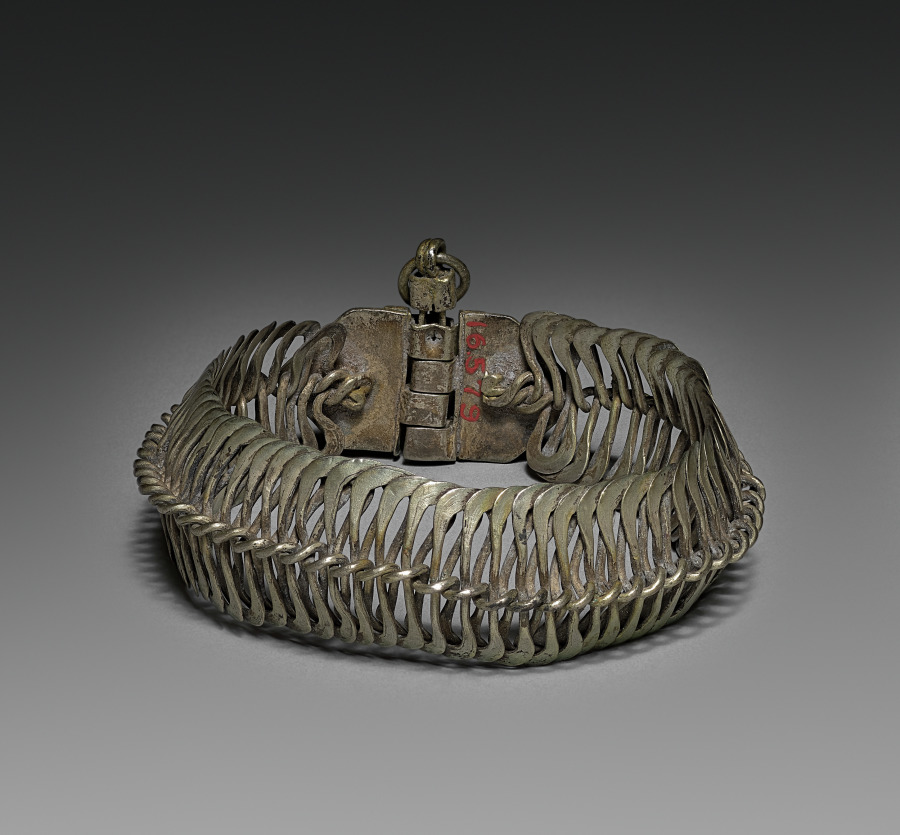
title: Bracelet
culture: India (?)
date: 1800s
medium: silver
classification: Jewelry